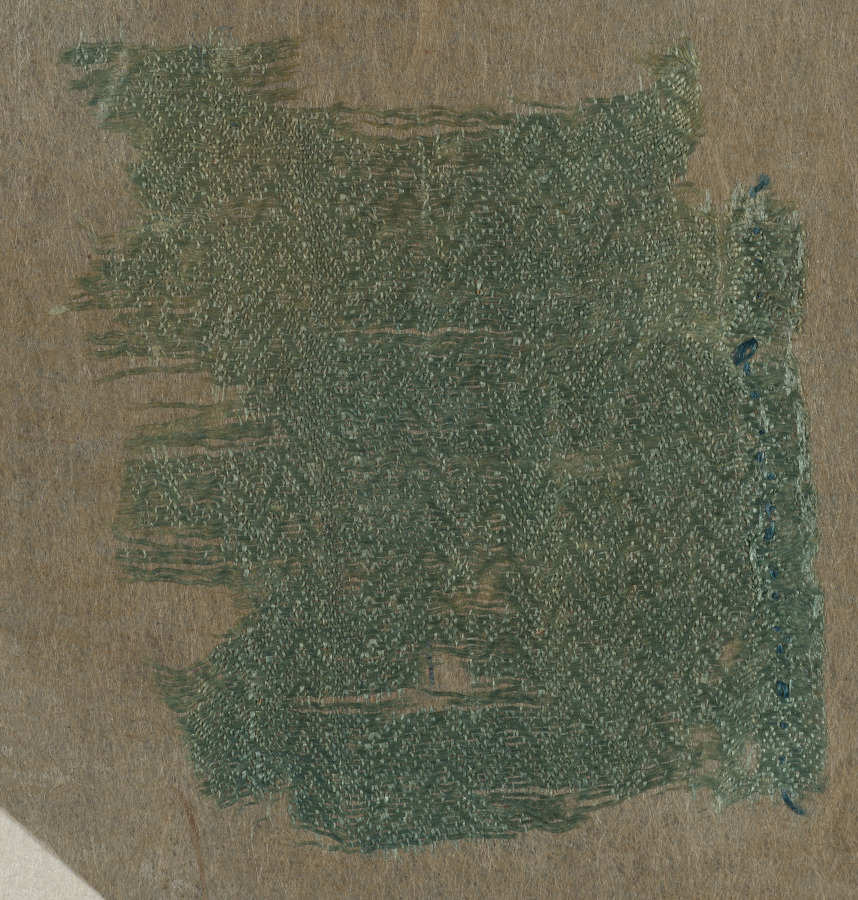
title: Fragment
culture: China, Tang dynasty (618-907)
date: 700s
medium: tabby ground and twill pattern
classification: Textile